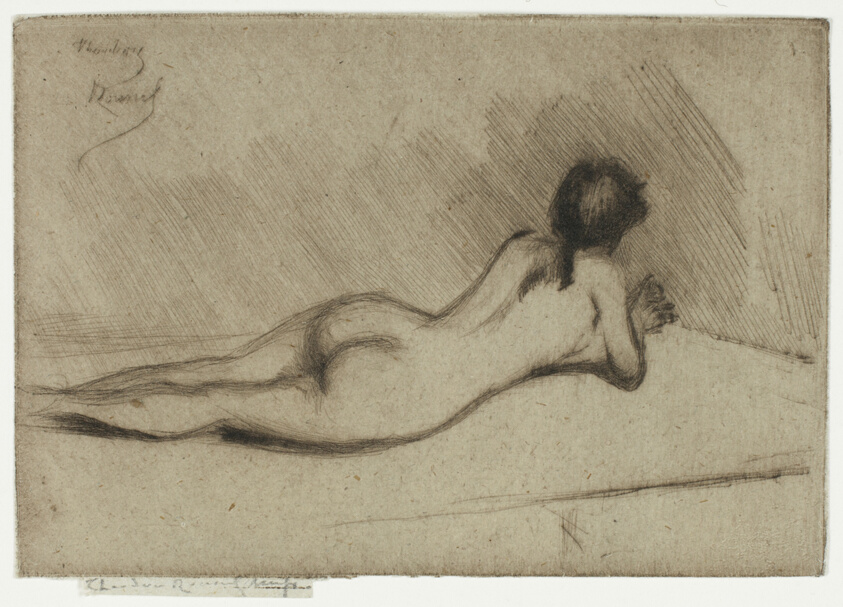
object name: Print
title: Study from the Nude of a Girl Lying Down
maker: Theodore Roussel (French, worked in England, 1847-1926)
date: 1890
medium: Drypoint in black on ivory laid paper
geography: England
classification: drypoint; print; prints and drawing